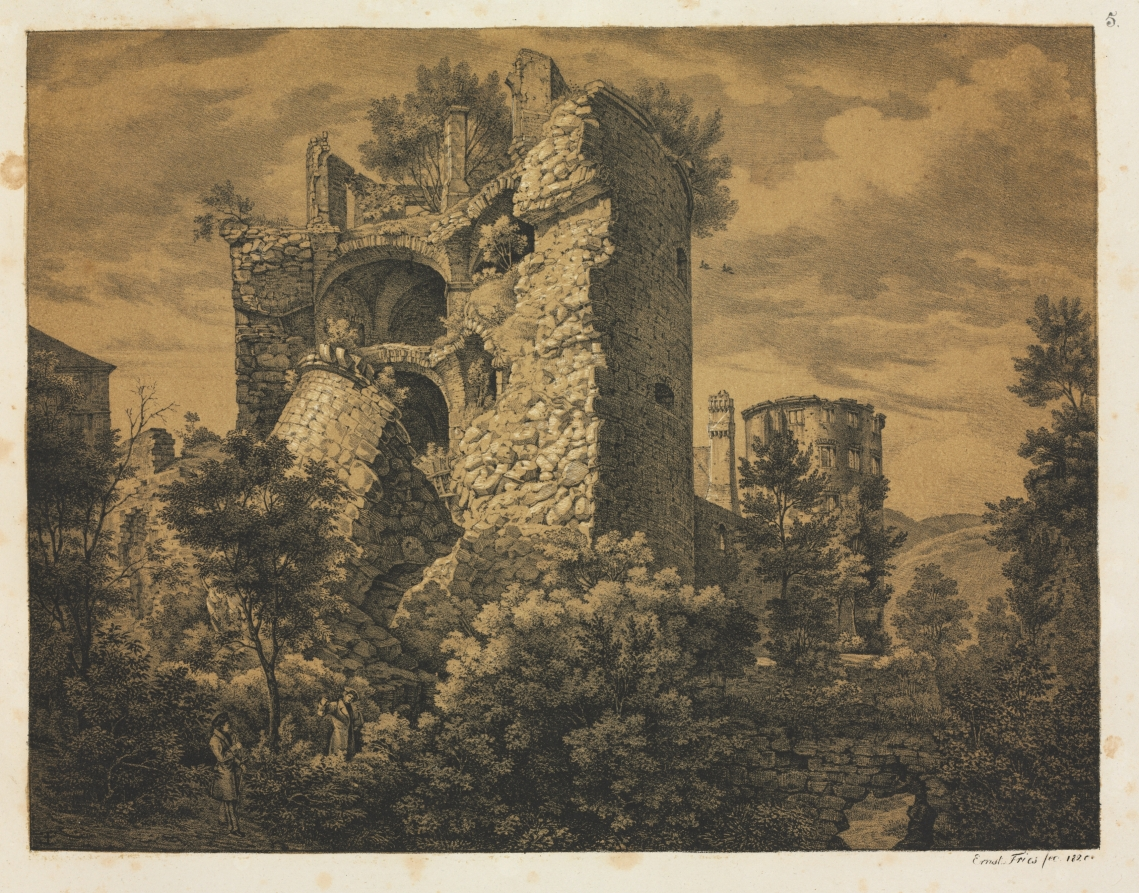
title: Six Views of Heidelberg Castle: Tower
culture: Germany, 19th century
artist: Ernst Fries (German, 1801–1833)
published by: Mohr & Winter, Heidelberg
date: 1820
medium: lithograph printed in black and a deep ochre tint stone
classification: Print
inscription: Inscribed in graphite upper right: 5; lower right margin: ? von Heidelberger Schloss